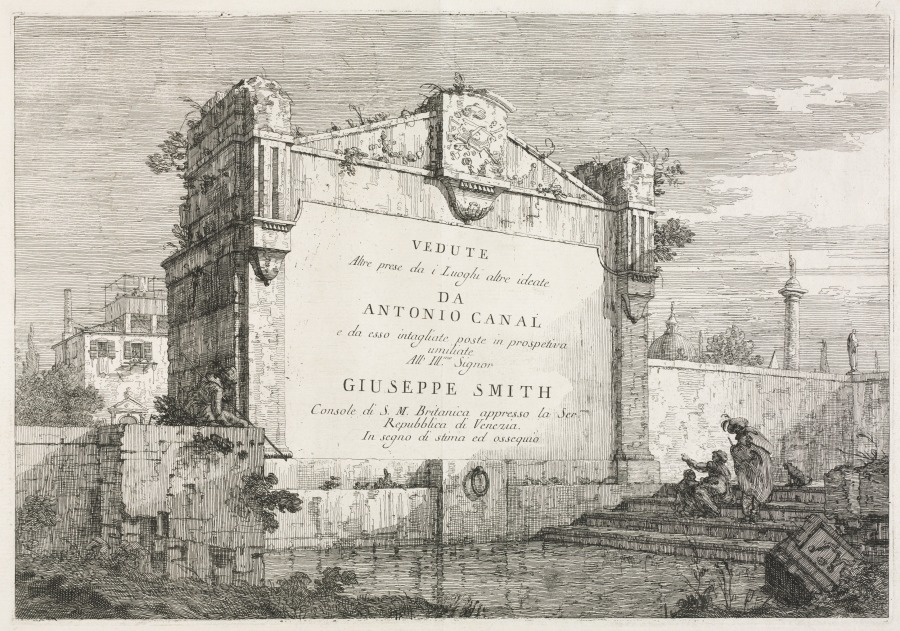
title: Views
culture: Italy, Venice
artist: Antonio Canaletto (Italian, 1697–1768)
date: 1735–46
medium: etching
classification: Print